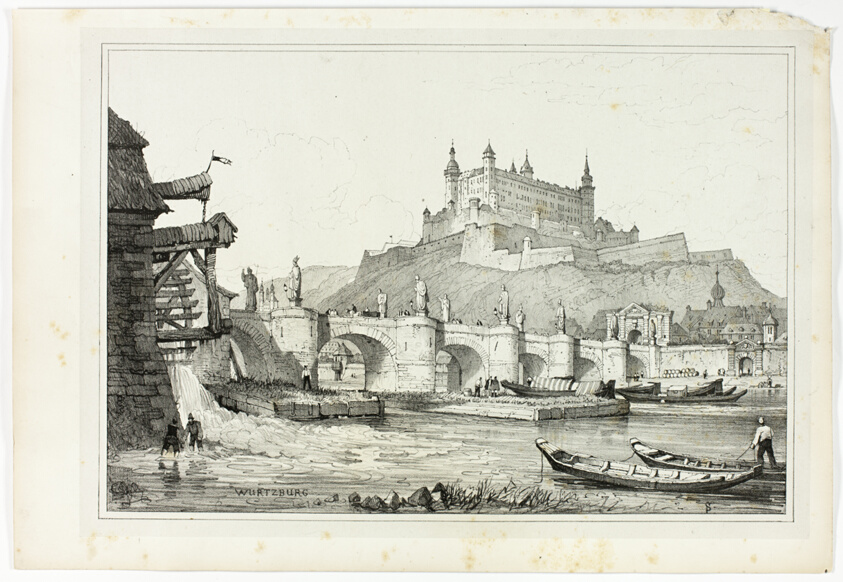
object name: Print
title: Wurtzburg, from Facsimiles of Sketches made in Flanders and Germany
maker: Samuel Prout (English, 1783-1852); printed by Charles Joseph Hullmandel (English, 1789-1850)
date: 1833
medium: Lithograph in black on grayish-ivory chine, laid down on ivory wove paper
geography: England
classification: lithograph; print; prints and drawing